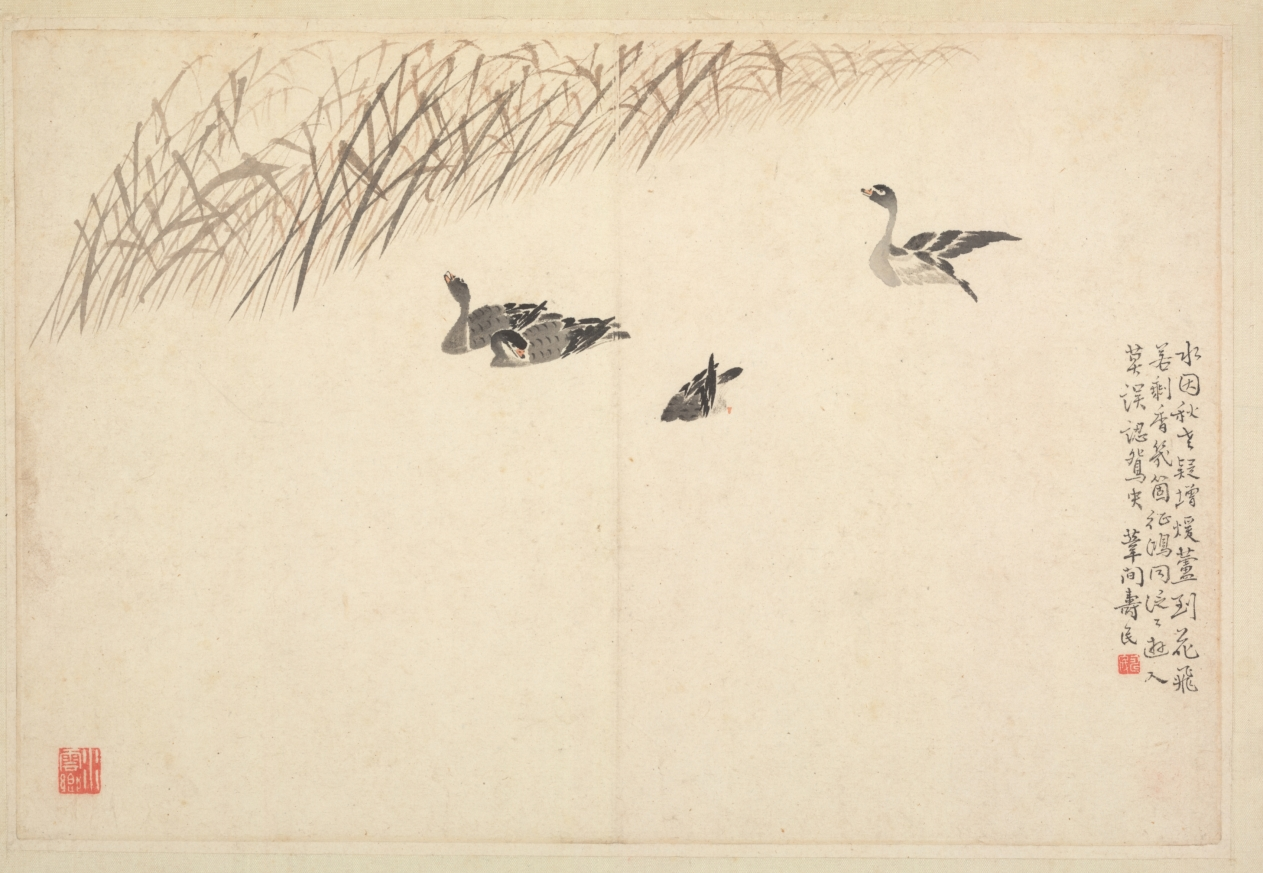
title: Album of Calligraphy and Paintings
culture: China, Qing dynasty (1644-1911)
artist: Bian Shoumin (Chinese, 1684–1752)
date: first half of the 1700s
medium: album leaf; ink and color on paper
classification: Painting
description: The artist Bian Shoumin is known for his depiction of wild geese, water, and reeds. The migrant birds in autumn and winter evoked, in the minds of the Chinese intelligentsia, a time of parting and sorrow.